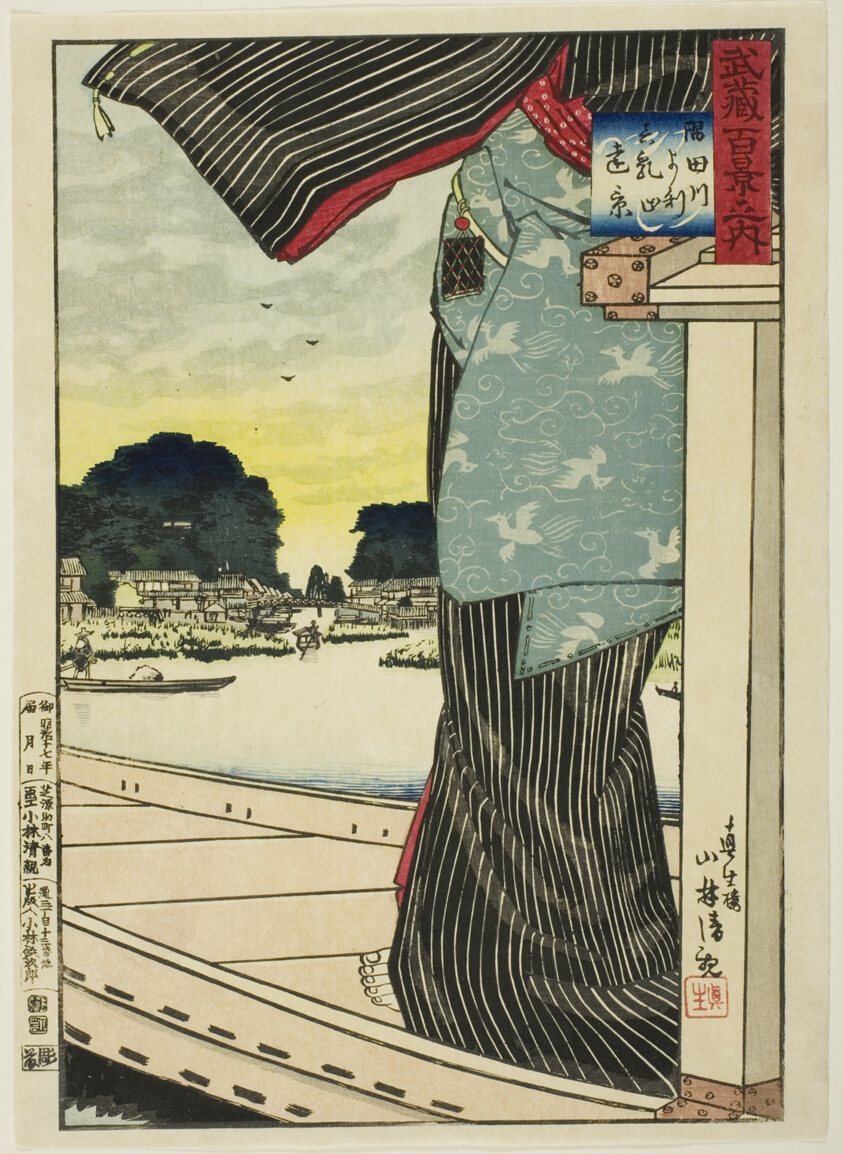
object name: Print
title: Distant View of Matsuchi Hill from the Sumida River (Sumidagawa yori Matsuchiyama enkei), from the series "One Hundred Views of Musashi Province (Musashi hyakkei no uchi)"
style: Japanese (culture or style), meiji, Japanism, East Asian, asian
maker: Kobayashi Kiyochika (Japanese, 1847-1915)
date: 1884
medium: Color woodblock print; oban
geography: Japan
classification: woodblock print; print; asian art